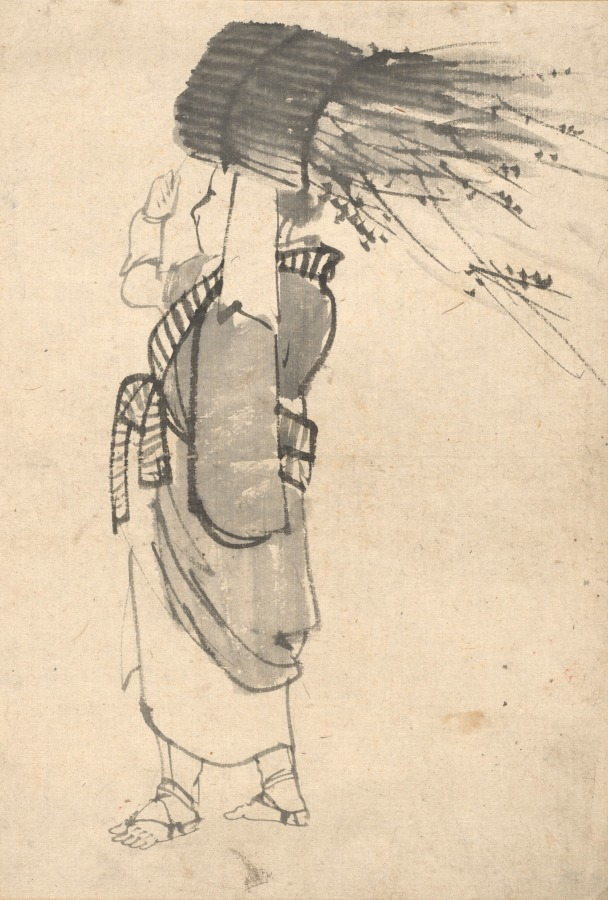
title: The Faggot Bearer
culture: Japan, Meiji period (1868–1912)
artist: attributed to Kono Bairei (Japanese, 1844–1895)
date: c. 1880–95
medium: ink and color on paper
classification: Drawing